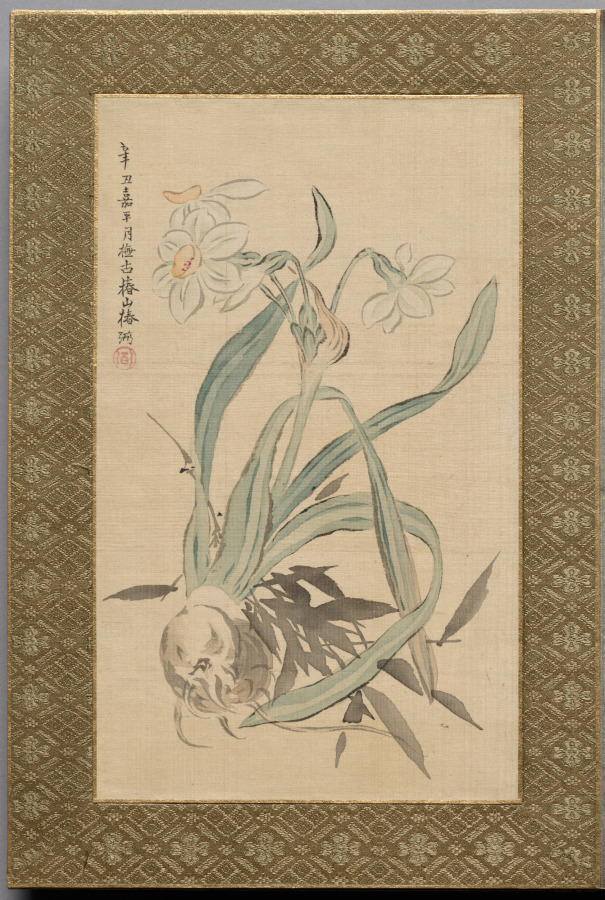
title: Painting from Flowers and Grasses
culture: Japan, Edo period (1615–1868)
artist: Tsubaki Chinzan (Japanese, 1801–1854)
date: 1841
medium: album; ink and color on silk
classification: Painting